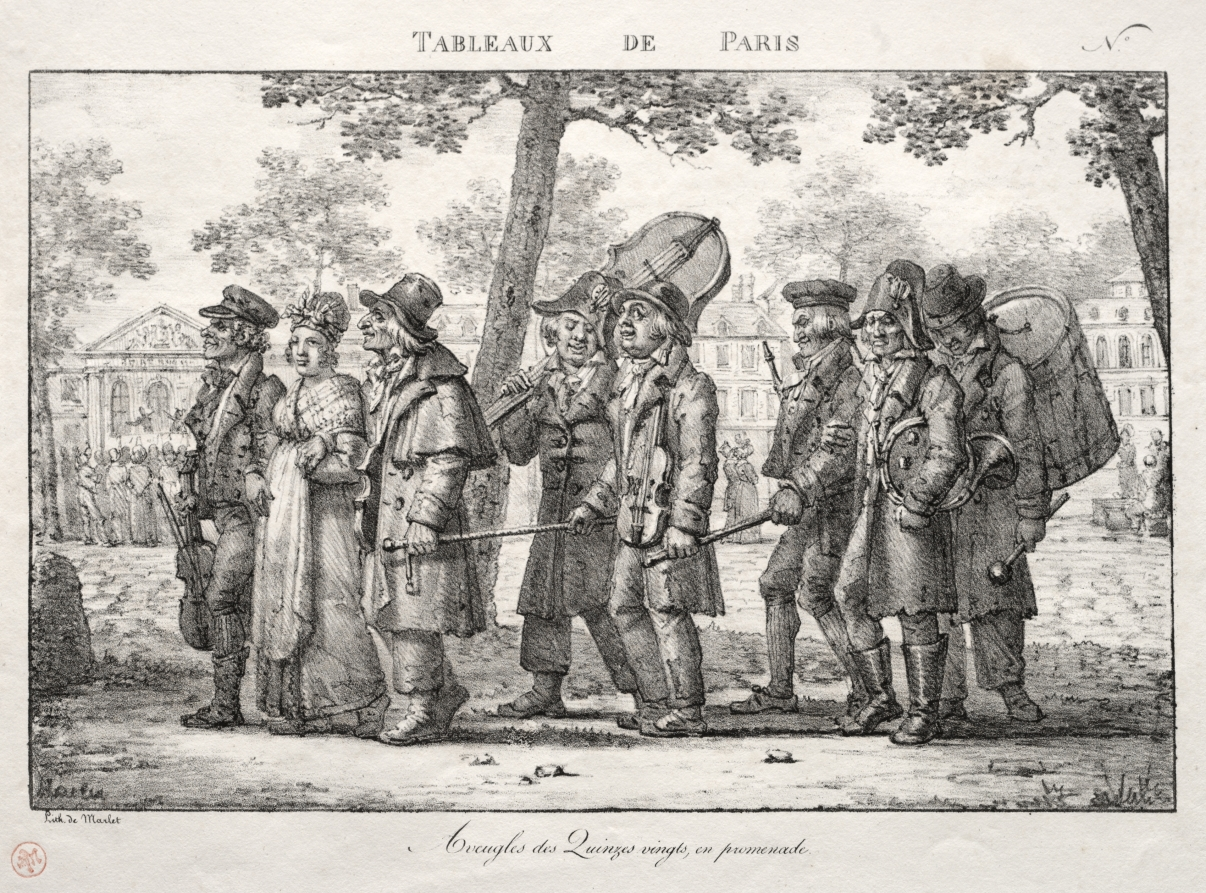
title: Blind Men from the Quinze Vingts, Walking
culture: France, 19th century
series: Scenes of Paris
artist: Jean Henri Marlet (French, 1770–1847)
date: 1820s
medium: lithograph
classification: Print